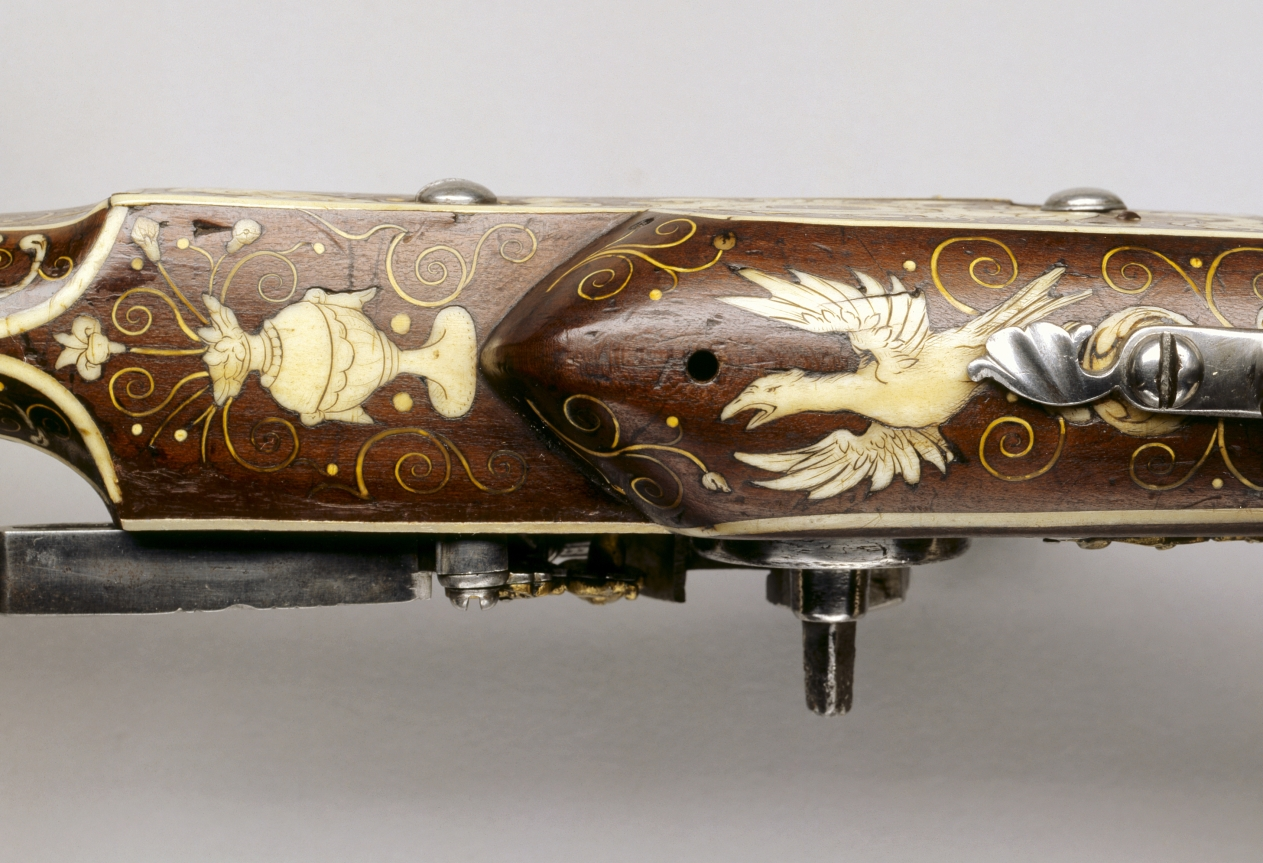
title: Wheel-Lock Rifle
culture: Germany, Bavaria (?), 17th century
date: 1618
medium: steel, brass, walnut stock inlaid with bone, horn and ivory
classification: Arms and Armor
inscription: on barrel: 1618, S.H.; on stock: FF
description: Made originally as a petronel pistol, this firearm seems to have been refitted with a new stock sometime during the 17th century to convert it into a rifle, most likely for a child's use.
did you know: The artisan who made this rifle used brass, bone, horn, and ivory to create decorative elements like animals involved in the hunt, fruits, and other details. If you look beneath the gun, you will see a goose or duck and a vase of flowers near the trigger.